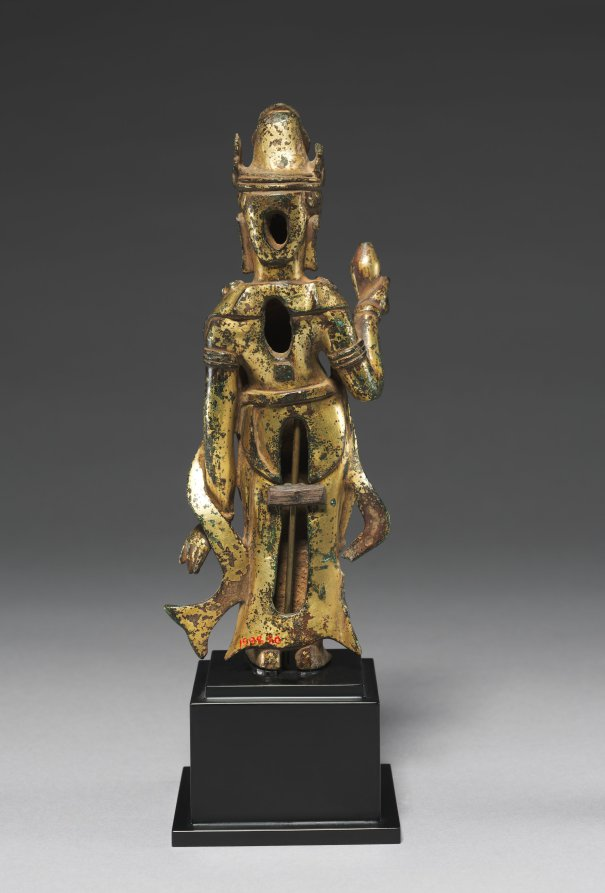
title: Standing Avalokitesvara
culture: Korea, Unified Silla period (668-935)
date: 700s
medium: Gilt-bronze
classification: Sculpture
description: This small gilt-bronze statue represents the Bodhisattva of Compassion (관음보살 in Korean), an enlightened being who helps devotees on their path. It features two prominent attributes: a water sprinkler (kundika in Sanskrit) and a miniature image of Buddha Amitābha in its jeweled crown. Its sweet and gentle smile accentuates this celestial being’s immeasurable compassion for human suffering.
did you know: Created during the Unified Silla period, a high point of the spread of Buddhist teachings, this kind of miniature gilt-bronze statue was often used as a portable object of devotion by traveling Buddhist monks.